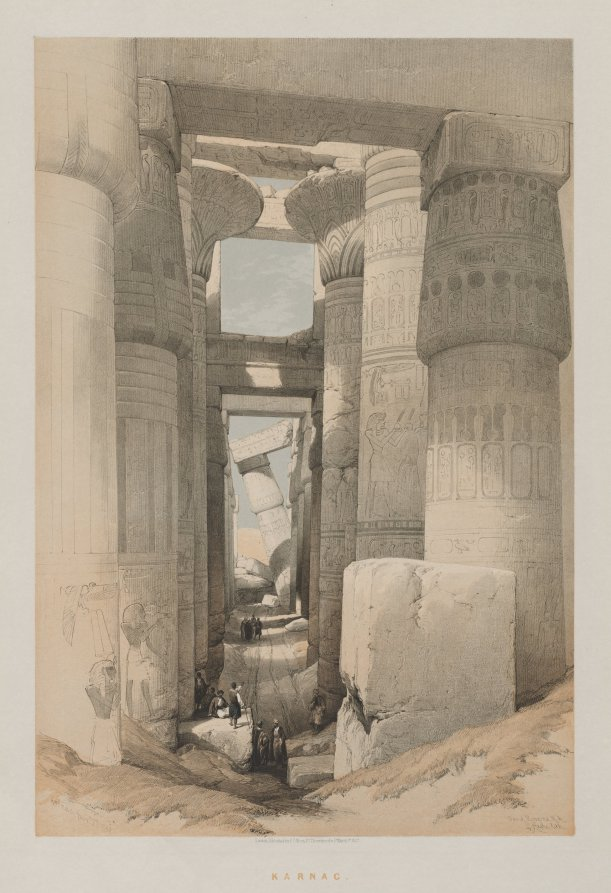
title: Egypt and Nubia, Volume II: Karnak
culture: England, 19th century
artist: Louis Haghe (British, 1806–1885)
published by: F. G. Moon, 20 Threadneedle Street, London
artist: after David Roberts (Scottish, 1796–1864)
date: 1847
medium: color lithograph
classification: Print